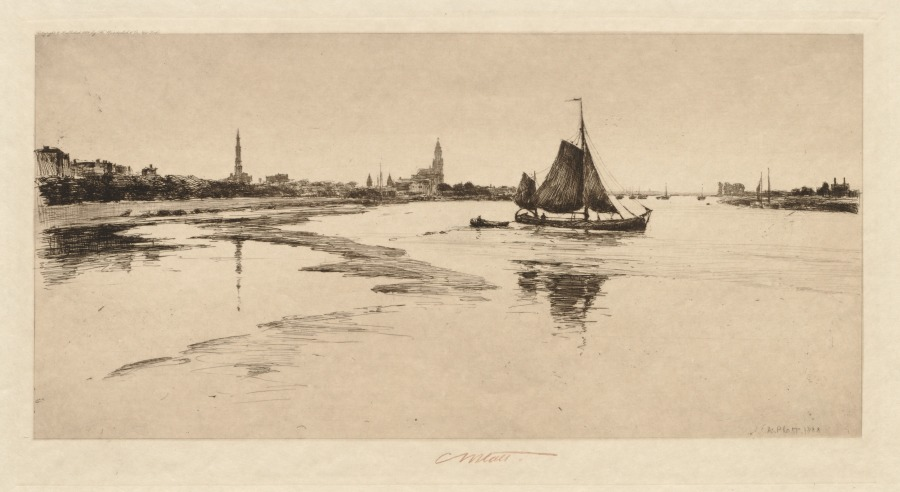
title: Arnheim on the Rhine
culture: America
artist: Charles Adams Platt (American, 1861–1933)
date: 1888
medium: etching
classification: Print